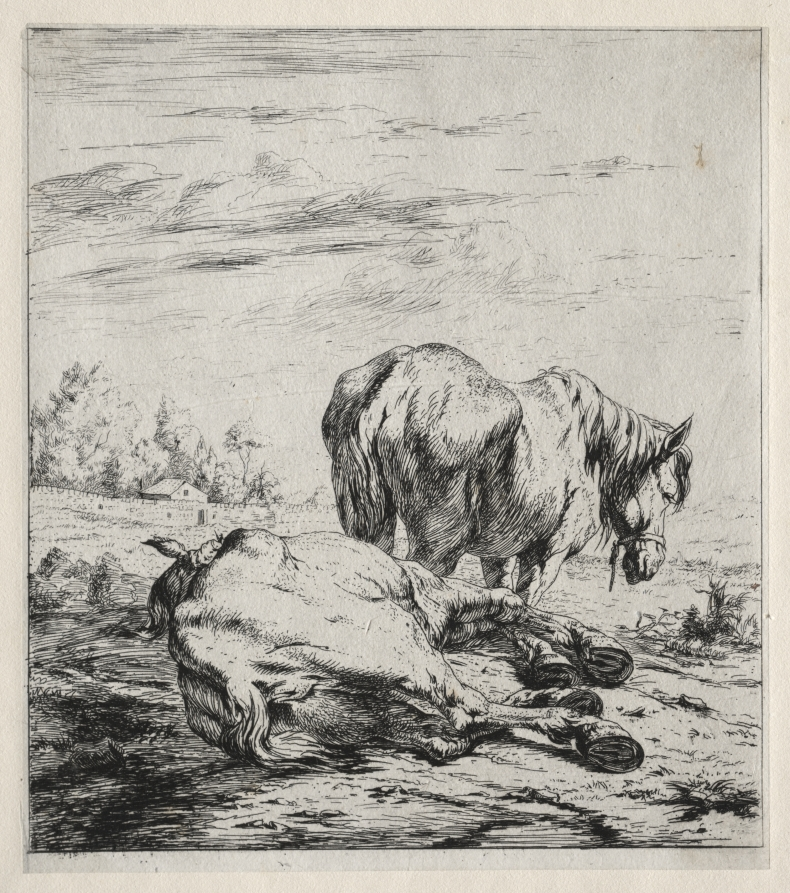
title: The Two Horses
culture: France, 19th century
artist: Charles Meryon (French, 1821–1868)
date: 1850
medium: etching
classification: Print